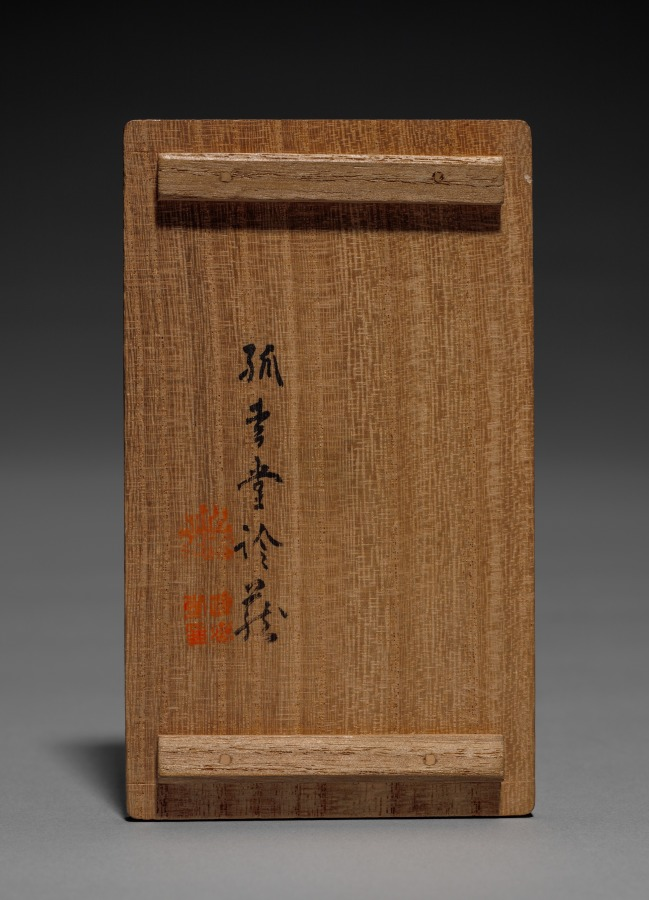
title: Pair of Tea Containers with Plum Blossoms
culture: Japan, Edo period (1615–1868)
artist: Aoki Mokubei (Japanese, 1767–1833)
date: early 1800s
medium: porcelain with underglaze blue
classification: Ceramic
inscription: signed "Ro Mokubei" on base in underglaze blue.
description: Aoki Mokubei, born into a family of restaurateurs, was a potter, calligrapher, painter, and scholar, and is considered one of the three masters of later Edo period Kyoto ceramics. He specialized in porcelains fashioned after Chinese prototypes, and created works for steeped tea (sencha) such as these matching tea caddies decorated in an underglaze blue called sometsuke—literally “with applied dye.” He signed them on their bottoms. They also have intricately patterned silk sleeves to both beautify and protect them. On the exterior of the lid of the outer wooden box that contains them, it is written that Mokubei inscribed and painted an image on the box. On the interior of the lid, the signature and seals of a former owner are written. Mokubei has signed the lid of the inner box, and a charming ink and light color composition of West Lake in Hangzhou in China covers its three sides. On the fourth side is a long inscription by Mokubei describing the scene.